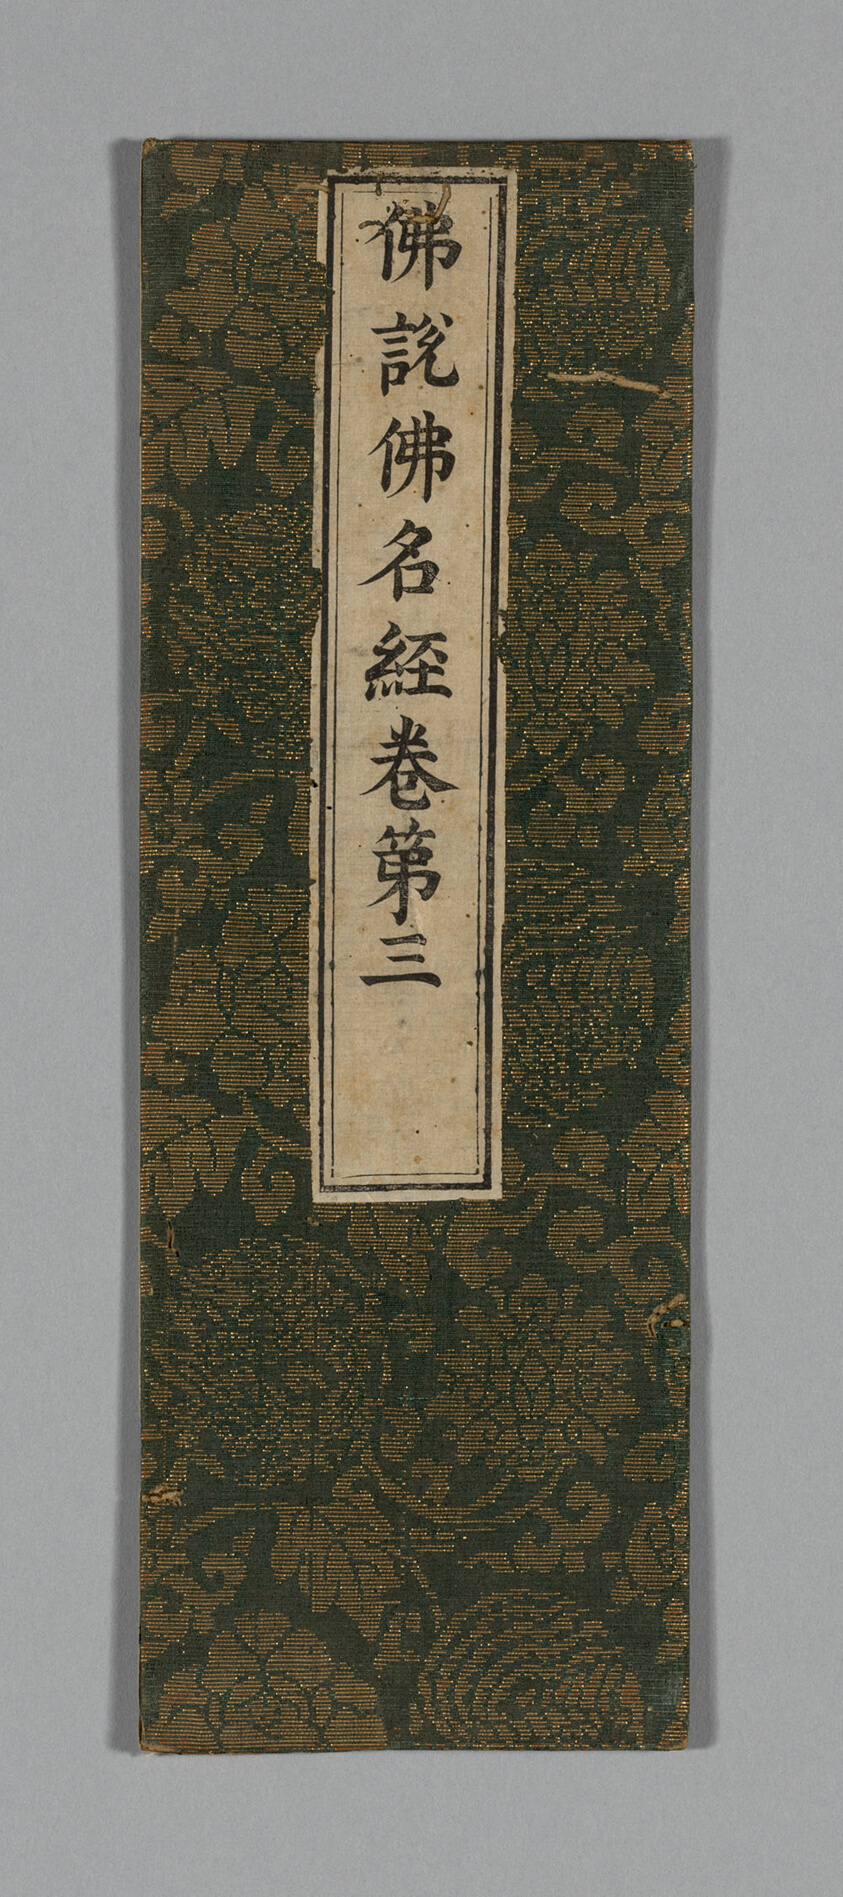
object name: Textile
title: Sutra Cover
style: ming, Chinese (culture or style), East Asian, asian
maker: China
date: Ming dynasty (1368–1644), c. 1590's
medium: Silk and gold-leaf-over-lacquered-paper strip; gauze weave with supplementary patterning wefts; label: paper; painted with ink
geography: China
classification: textile; weaving